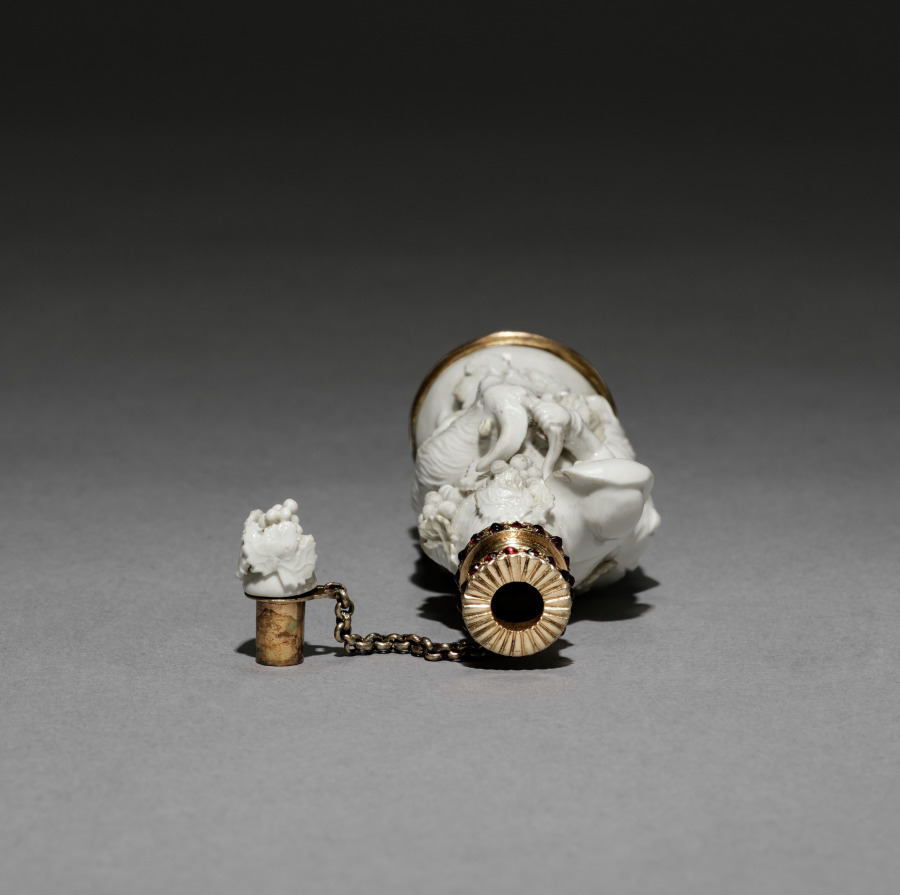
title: Scent Bottle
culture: England, Chelsea, mid-18th century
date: mid 1700s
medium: soft-paste porcelain with gilt metal mounts set with red faceted stones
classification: Miscellaneous